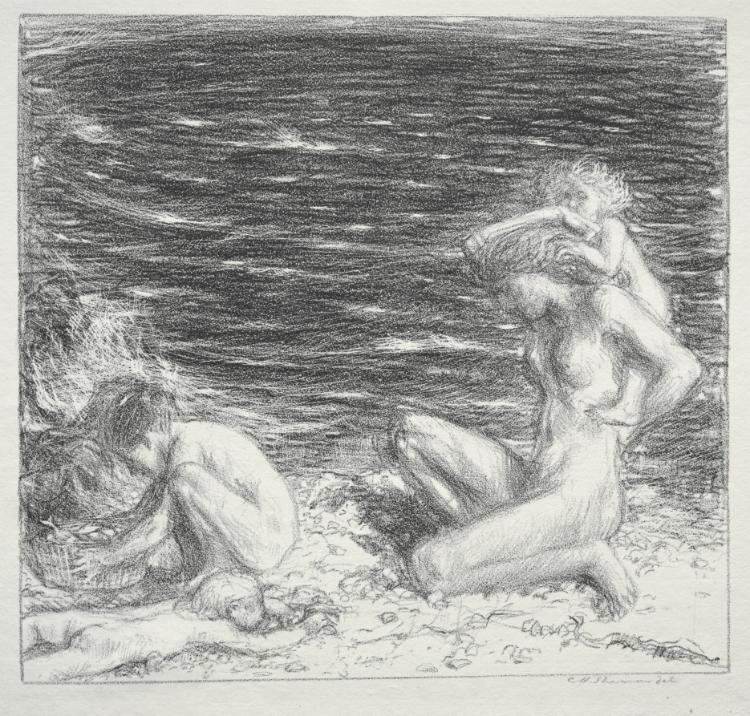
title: Sea and Breeze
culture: England, late 19th Century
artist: Charles Hasslewood Shannon (British, 1863–1937)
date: 1894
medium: lithograph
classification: Print